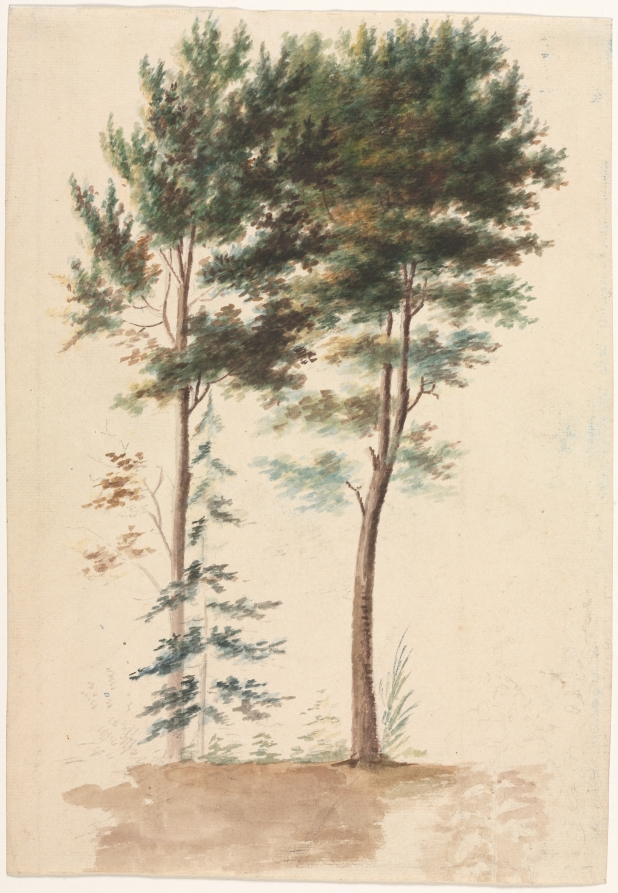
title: Trees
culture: France, 18th century (?)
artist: Jean Baptiste Pillement (French, 1728–1808)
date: 1700s(?)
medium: watercolor over graphite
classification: Drawing